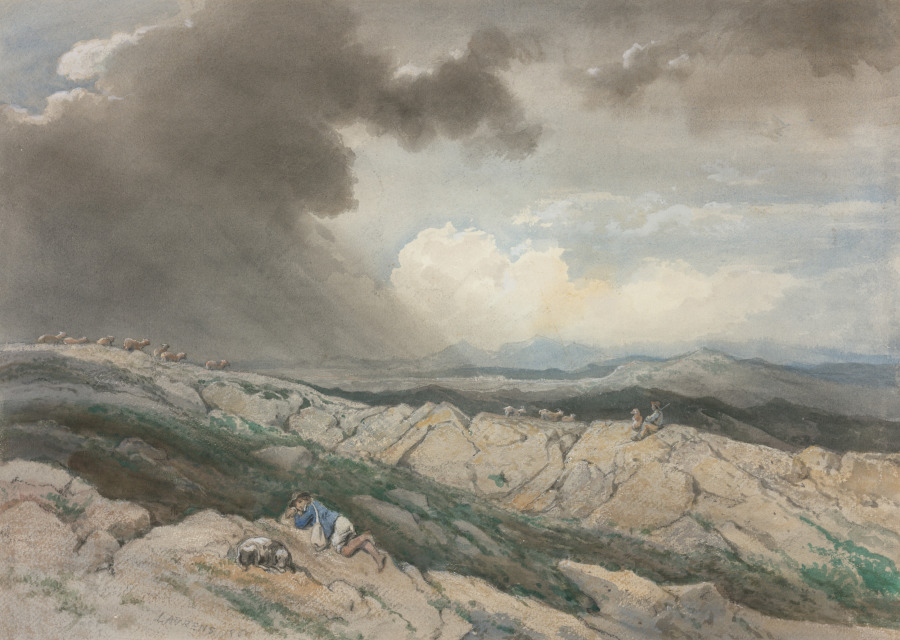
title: Landscape with Shepherds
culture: France, 19th century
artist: Jules Joseph Augustin Laurens (French, 1825–1901)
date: c. 1869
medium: Watercolor with gouache, black chalk, and graphite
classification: Drawing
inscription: lower left, in graphite: LAURENS 1869[?]